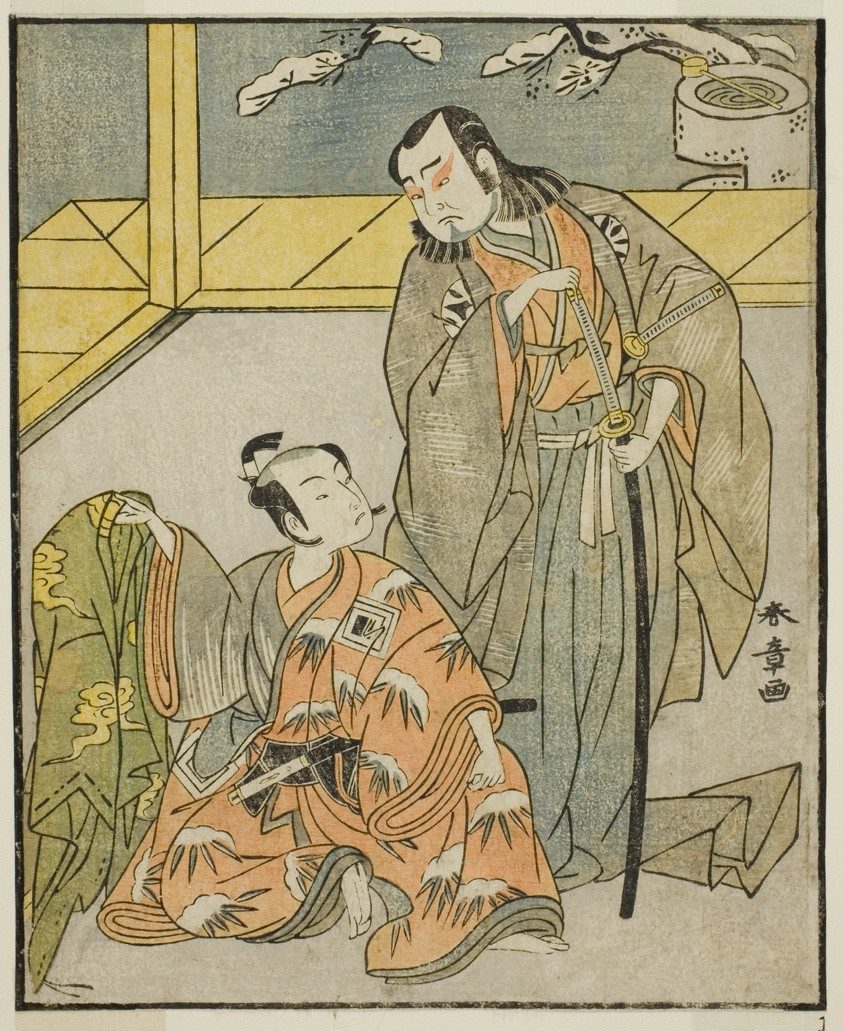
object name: Print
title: The Actors Nakamura Denkuro II as Suma no Dairyo (right), and Ichikawa Komazo II as Ariwara no Yukihira (left), in the Play Kuni no Hana Ono no Itsumoji, Performed at the Nakamura Theater in the Eleventh Month, 1771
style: Japanese (culture or style)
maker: Katsukawa Shunsho 勝川 春章; Japanese, 1726-1792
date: c. 1772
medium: Color woodblock print; from the illustrated book Yakusha Kuni no Hana (Prominent Actors of Japan)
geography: Japan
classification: woodblock print; print; asian art